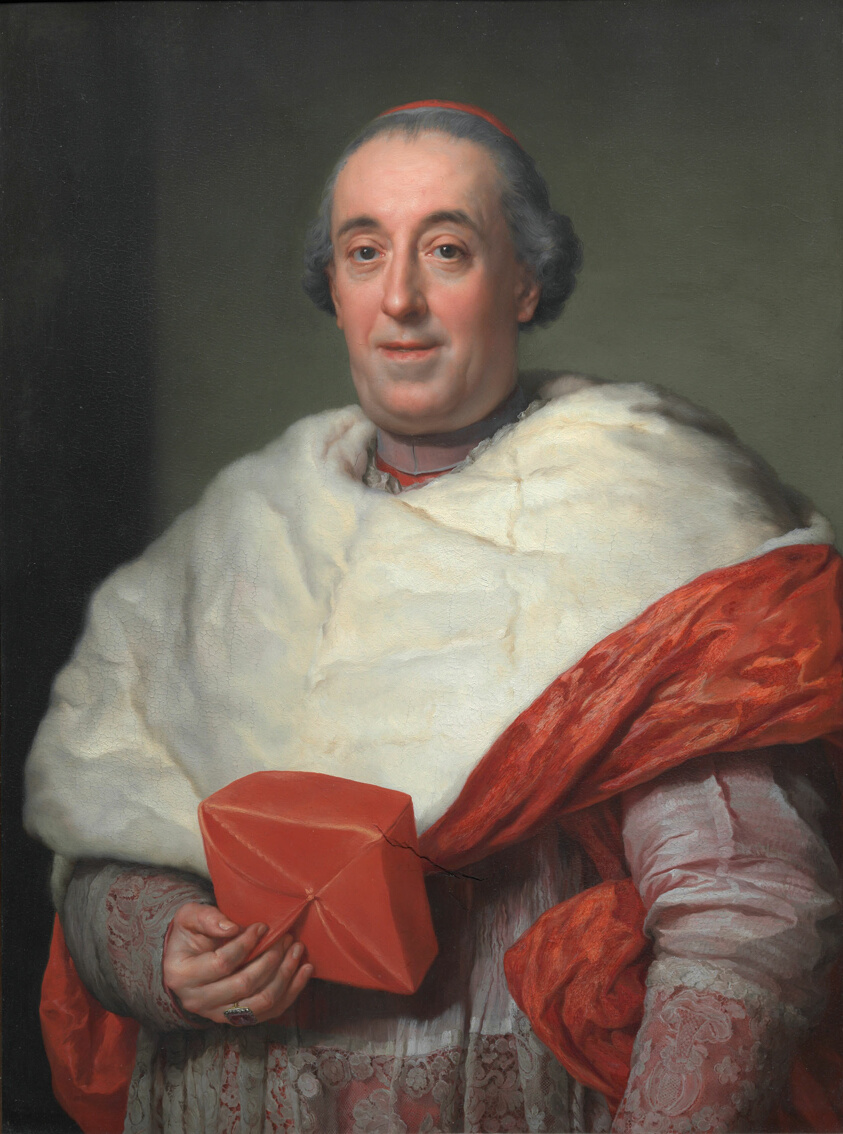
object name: Painting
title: Portrait of Cardinal Zelada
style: 18th Century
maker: Anton Raphael Mengs (German, 1728–1779)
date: 1773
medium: Oil on panel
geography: Germany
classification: oil on panel; portrait; paint; oil paintings (visual works); german; painting; european painting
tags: portraits: male subject, portrait, portraits, religious attire, red (color), box, religious